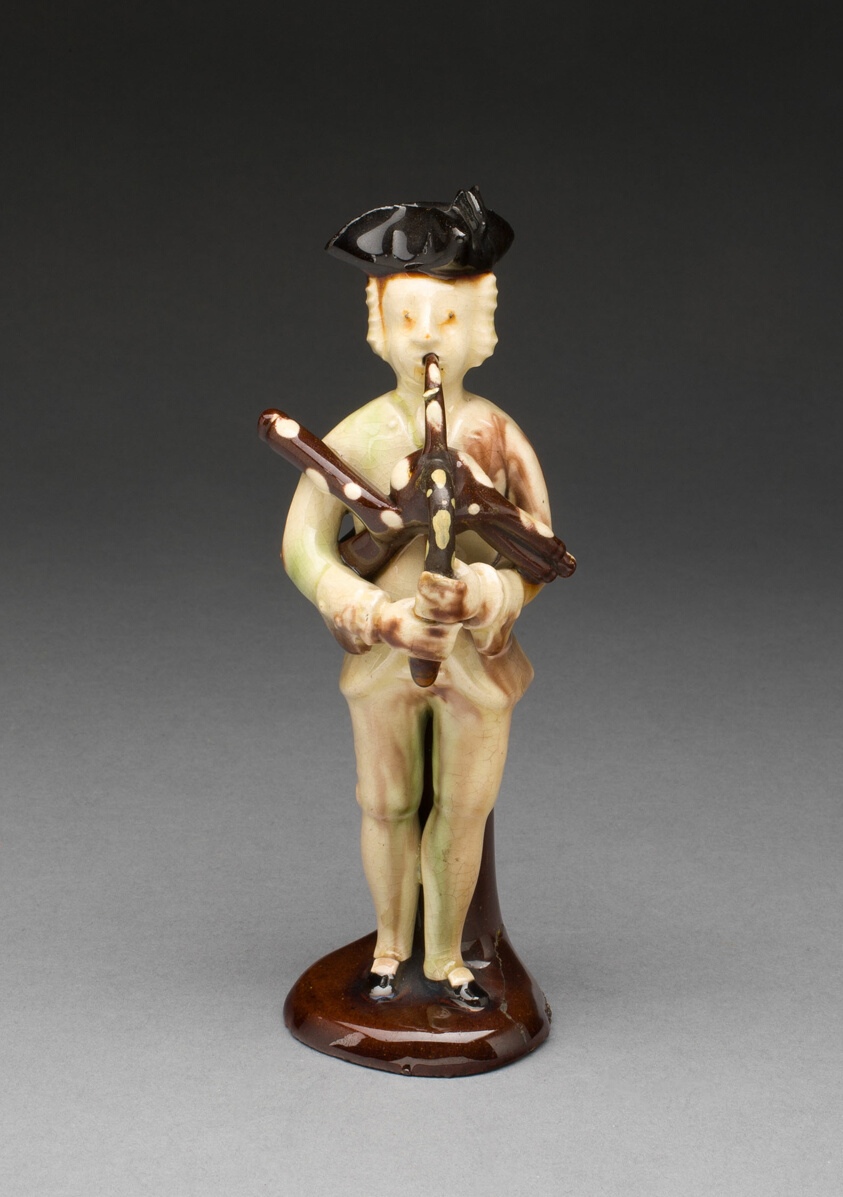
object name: Ceramics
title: Bagpiper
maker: England, Staffordshire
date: 1750/70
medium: Lead-glazed earthenware (creamware and redware)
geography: Staffordshire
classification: earthenware; redware; european decorative arts; creamware; ceramics; lead-glazed earthenware